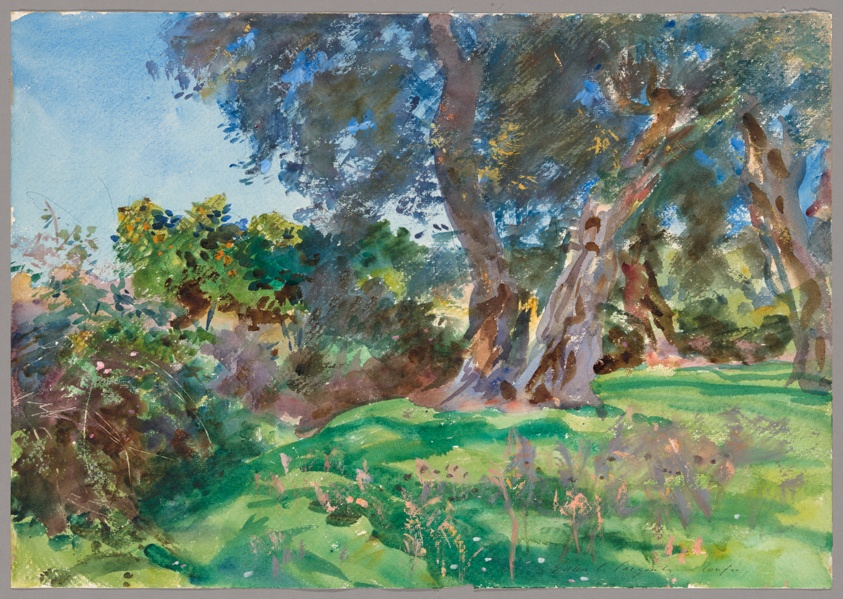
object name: Drawing and Watercolor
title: Olive Trees, Corfu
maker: John Singer Sargent (American, 1856-1925)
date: 1909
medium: Watercolor and opaque watercolor with scraping and wax resist over graphite on ivory wove paper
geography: United States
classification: watercolor; drawings (visual works); prints and drawing